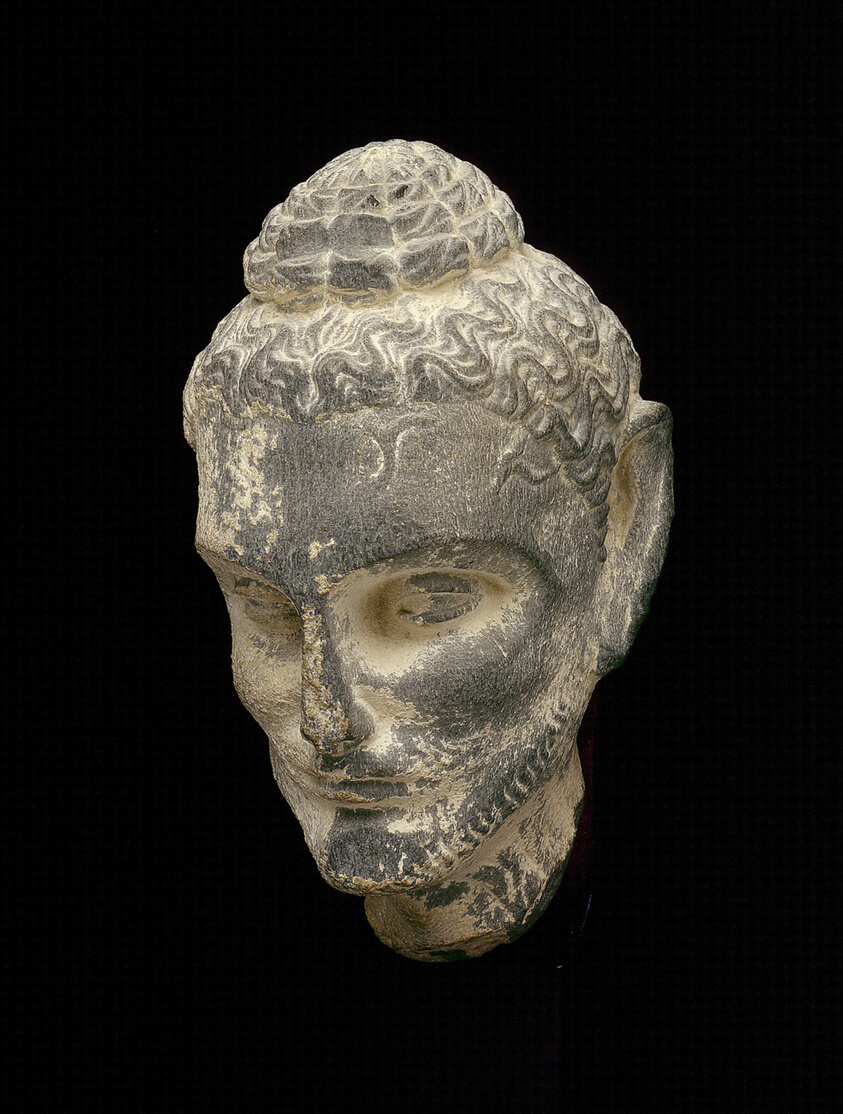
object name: Sculpture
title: Head of Emaciated Siddhartha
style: South Asian, gandharan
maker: Pakistan; Ancient region of Gandhara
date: 2nd/3rd century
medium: Gray schist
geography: Gandhara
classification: bust/head; schist; stone; sculpture; asian art